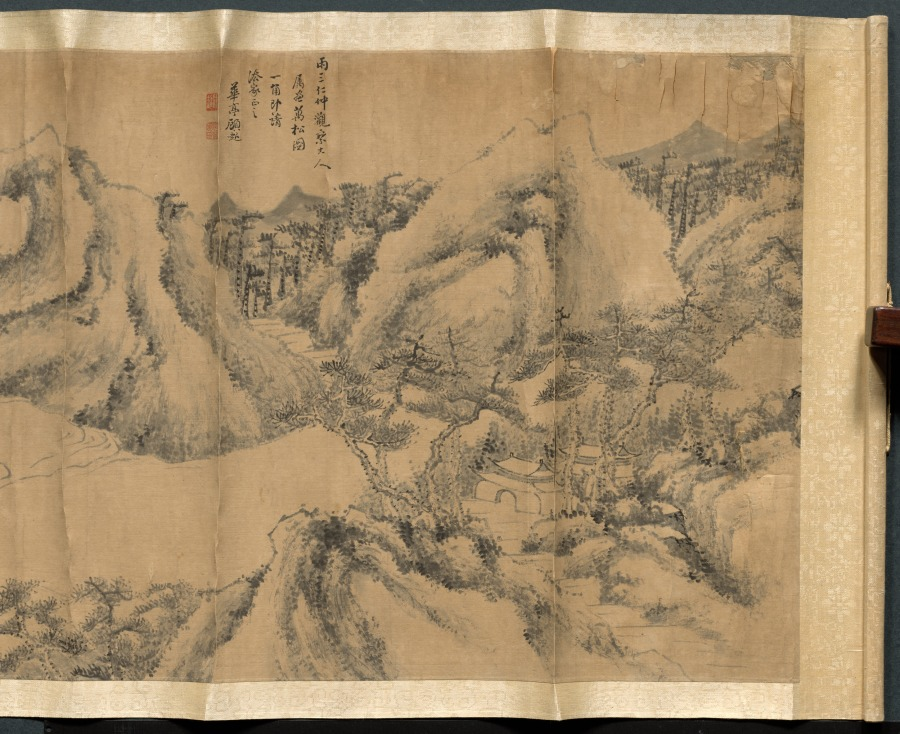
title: Pine-shaded Monastery on a Cloudy Mountain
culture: China, Qing dynasty (1644-1911)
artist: Gu Chao (Chinese, active late 1700s)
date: late 1700s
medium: handscroll, ink and slight color on paper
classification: Painting